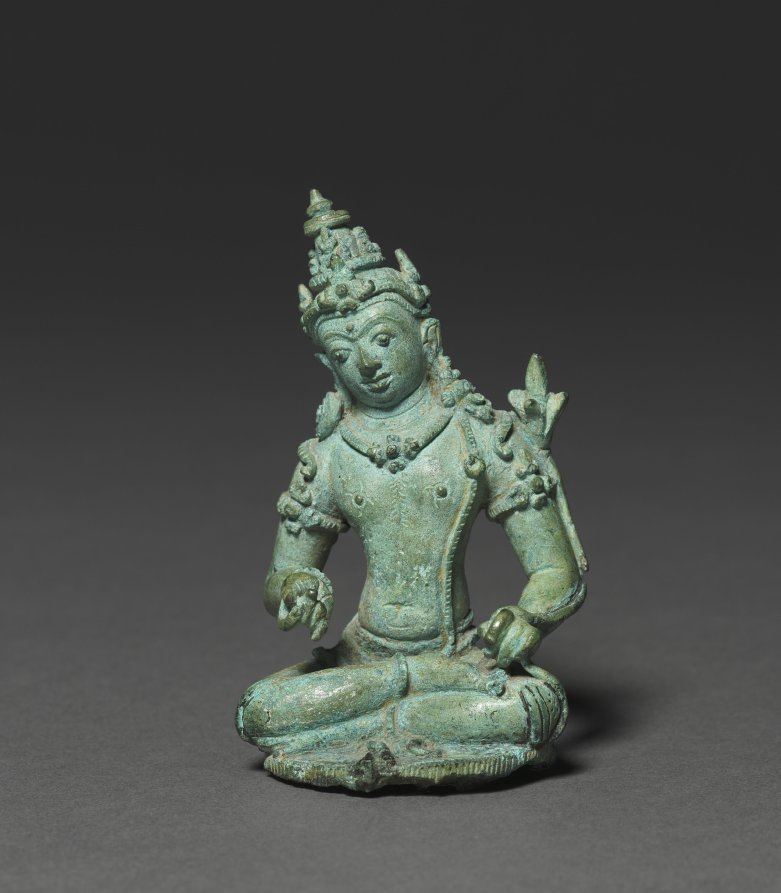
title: Bodhisattva Padmapani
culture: Java, predating Nganjuk style, 10th century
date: 900s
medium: bronze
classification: Sculpture